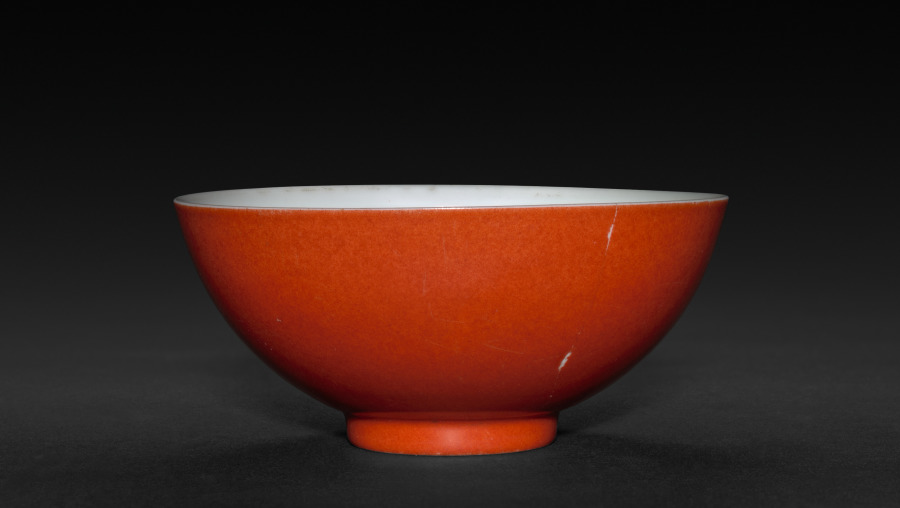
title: Wine Cup with Monochrome Red Glaze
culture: China, Jiangxi province, Jingdezhen kilns, Qing dynasty (1644-1911), Yongzheng mark and reign (1723-35)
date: 1723–35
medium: porcelain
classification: Ceramic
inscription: 大清雍正年制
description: In the Qing dynasty (1644–1911), luxury items became more affordable to larger parts of the society, including women, merchants, and literati in non-official positions. Imperial patronage and a growing urban population encouraged consumption of luxury goods and local craftmanship. This wine cup has a coral glaze on outside and a transparent glaze of white eggshell porcelain on the inside. It exemplifies Qing dynasty accomplishments in porcelain techniques and the creative mind of talented artisans who sought clients on a competitive market.